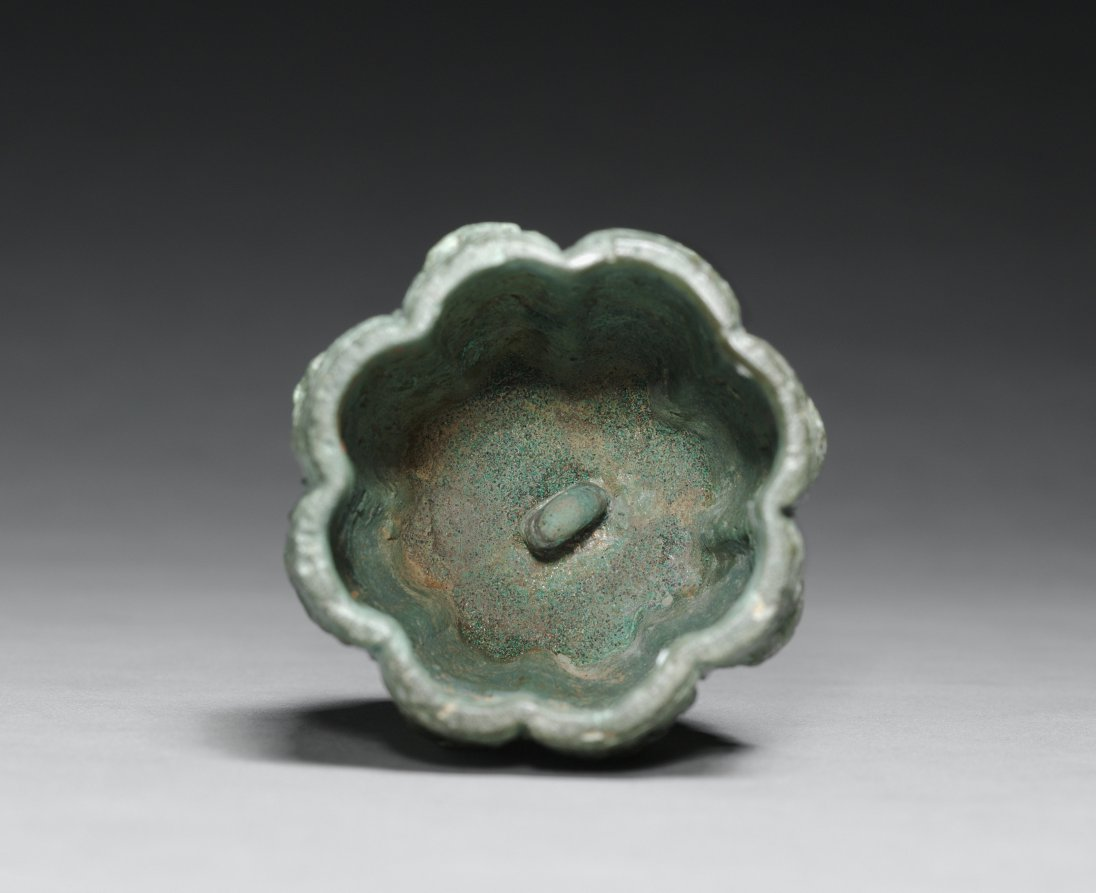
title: Buddhist Ritual Bell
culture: Korea, Goryeo dynasty (918–1392)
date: 1300s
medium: bronze; with incised designs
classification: Metalwork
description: This Buddhist ritual bell is called the "five-pronged" bell due to the four prongs bending toward a central prong at the end of the handle. This shape is a vajra, or lightning bolt, a powerful and important symbol in esoteric Buddhism, which originated in India, spread across Asia, and was practiced in Korea.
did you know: Called a vajra in Sanskrit, this implement is used in Buddhist rituals meant to destroy ignorance.